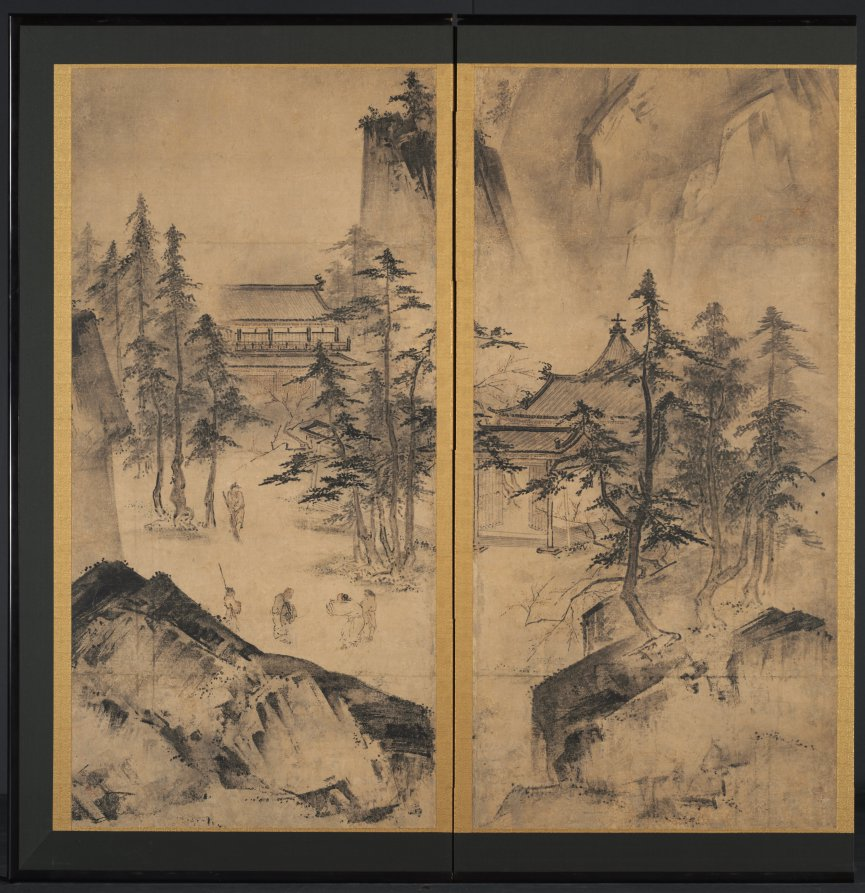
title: Winter and Spring Landscape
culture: Japan, Muromachi period (1392–1573)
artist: attributed to Tenshō Shūbun (Japanese)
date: early to mid-1400s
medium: Six-panel folding screen; ink and slight color on paper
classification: Painting